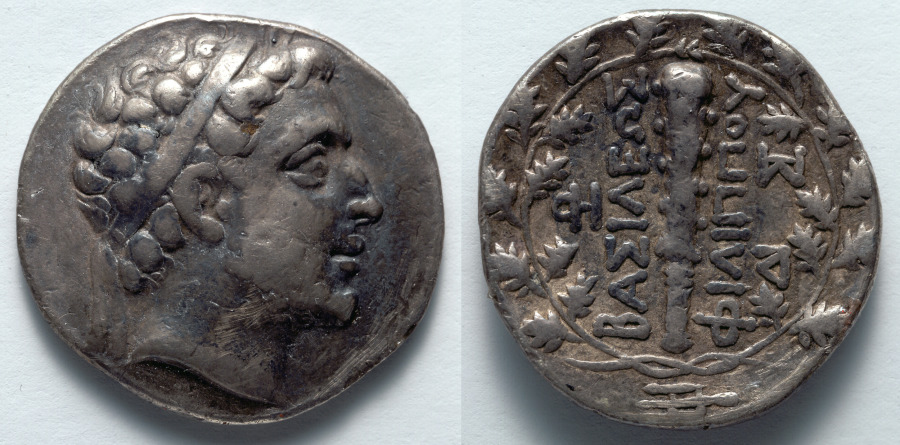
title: Didrachm: Head of Philip V (obverse); Club (reverse)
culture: Greek, Macedonian, minted in Macedonia, reign of Philip V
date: 220–179 BCE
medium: silver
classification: Coins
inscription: ΒΑΣΙΛΕΩΣ | ΦΙΛΙΠΠΟΥ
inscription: ΔΙ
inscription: Ι within Σ